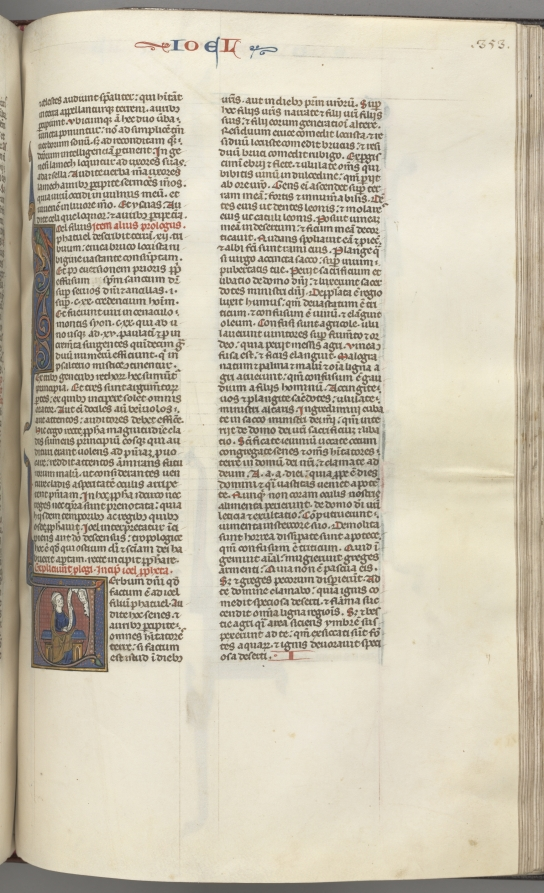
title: Fol. 353r, Joel, historiated initial V, Joel seated with a scroll, bust of God above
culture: Southern France, Toulouse(?), 13th century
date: c. 1275–1300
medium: ink, tempera and gold on vellum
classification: Bound Volume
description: Biblical manuscripts were highly prized and important possessions of churches, monasteries, cathedral schools, and universities throughout medieval Europe. The biblical texts were known as the vulgate, the translations made by Saint Jerome in the fourth century from Hebrew and Greek into Latin, which became the definitive and official Latin version of the Roman Church. In the 13th century, the bible was, for the first time, produced as a single volume with an officially sanctioned sequence to its books and chapters as illustrated by this example. The very extensive decoration of this bible is arranged hierarchically to indicate the relative importance of the various texts so that full or almost full-page initials mark the openings of the first prologue, Genesis, and the first Gospel; historiated initials mark the beginning of each book and illuminated initials mark the Prologues.